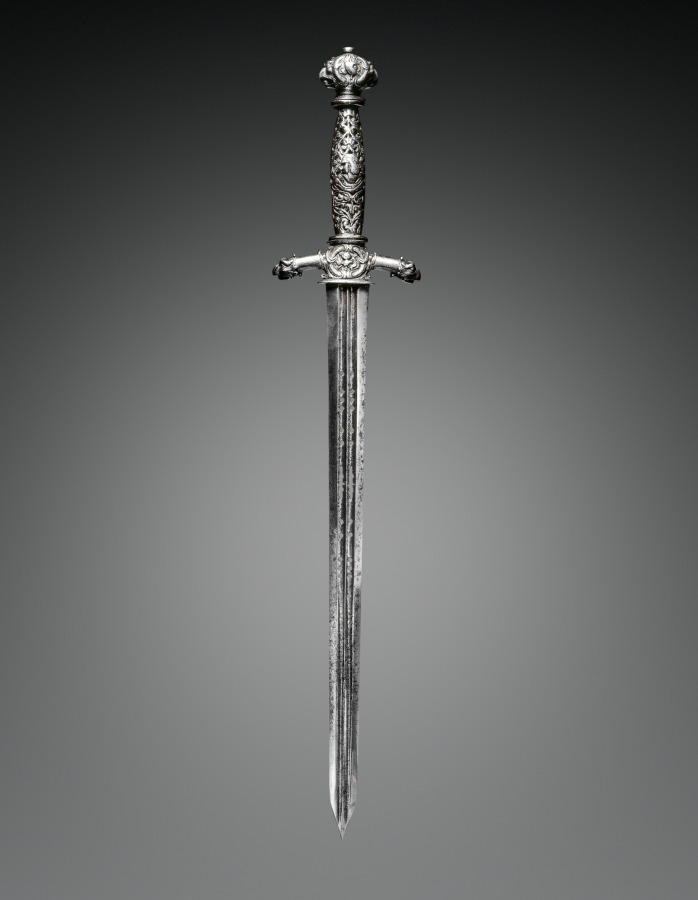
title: Dagger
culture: Italy, early 17th century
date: early 1600s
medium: steel, perforated blade; openwork grip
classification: Arms and Armor